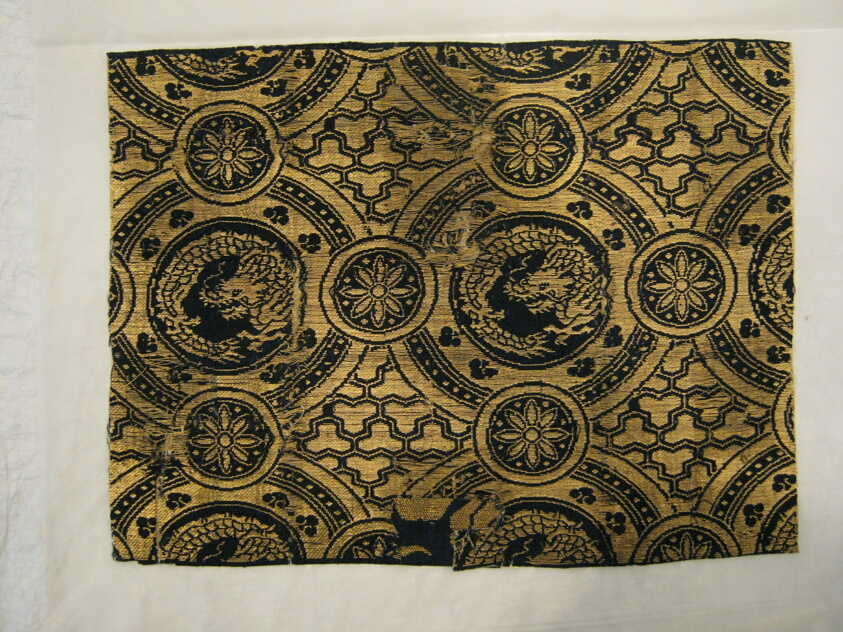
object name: Textile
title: Fragment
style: edo (japanese period)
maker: Japan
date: Edo period (1615–1868), 1775/1800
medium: Plain compound twill, silk and gilt paper; 3 strips to m.m.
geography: Japan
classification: textile; weaving